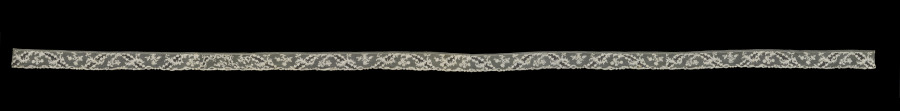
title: Lace Edging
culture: Belgium, Brussels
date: 1700s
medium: Linen: bobbin lace (Point d'Angleterre)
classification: Lace